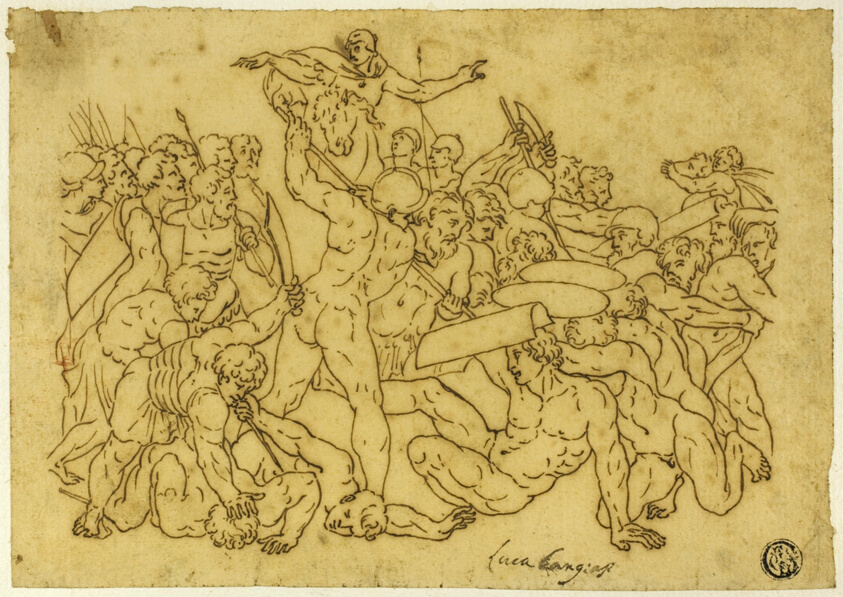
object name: Drawing and Watercolor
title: Joshua Halting the Sun and Moon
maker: After Raffaello Sanzio, called Raphael, and workshop; Italian, 1483-1520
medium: Pen and brown ink, on tan laid paper, laid down on ivory laid paper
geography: Italy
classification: pen and ink drawings; drawings (visual works); prints and drawing